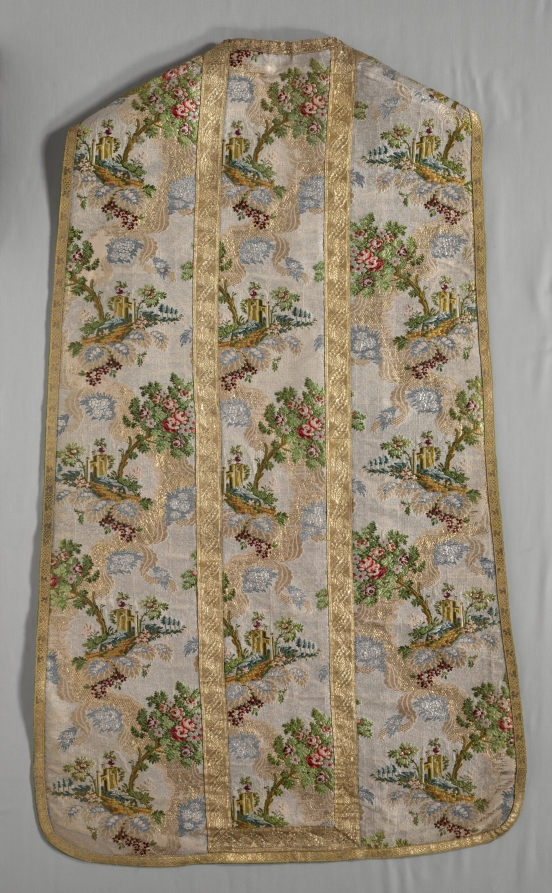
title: Chasuble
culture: France, Lyon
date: c. 1760–70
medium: taffeta, brocaded; silk, silver, and gold thread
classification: Textile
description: This costly woven silk with brilliant strips of gold foil features landscapes with blossoming trees and architecture, motifs that were popular by the 1760s. Its asymmetrical pattern suggests it was designed as a furnishing fabric rather than for clothing. Perhaps it was donated by a faithful parishioner to be made into an ecclesiastical vestment in a well-established practice.